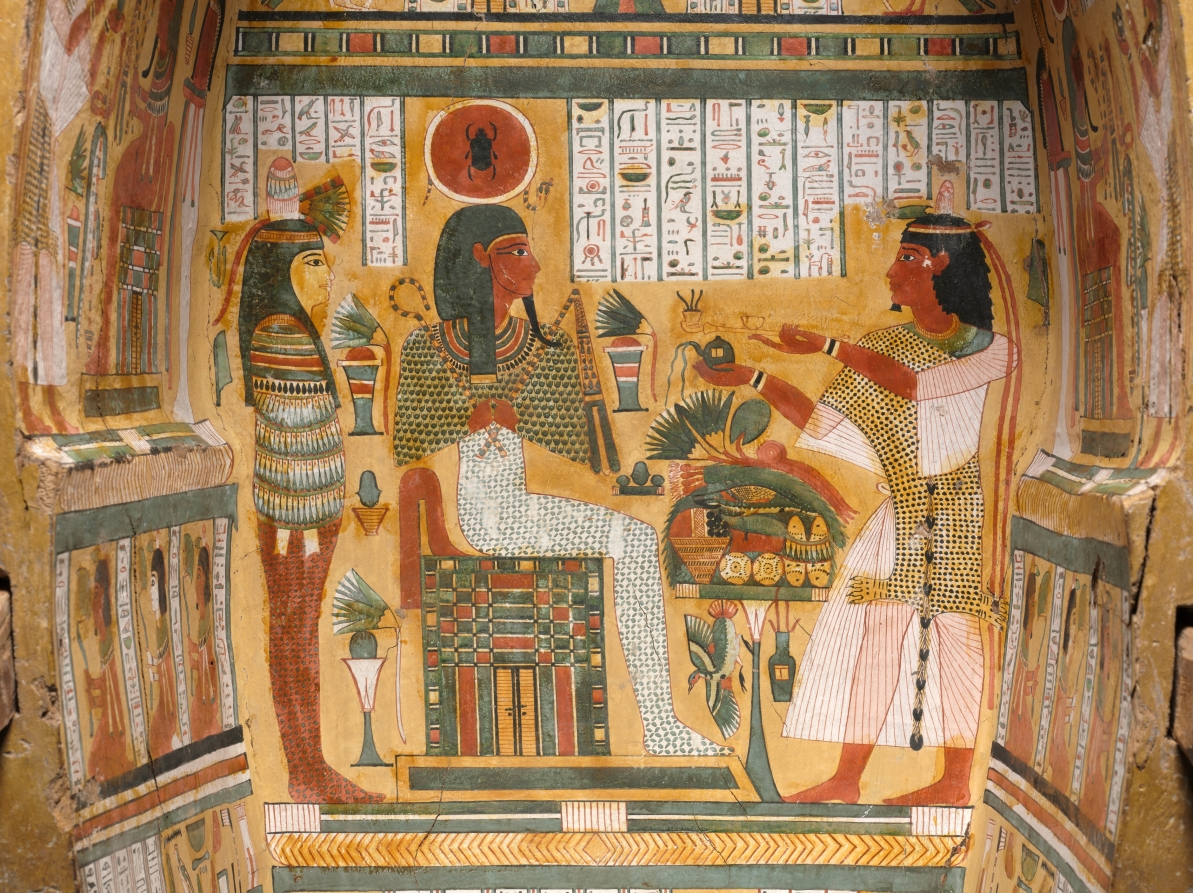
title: Coffin of Nesykhonsu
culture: Egypt, Thebes, Third Intermediate (1069–715 BCE), Dynasties 21–22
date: c. 976–889 BCE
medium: gessoed and painted sycamore fig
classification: Funerary Equipment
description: Egyptian coffins told stories and illustrated spells to help the deceased transition safely to the afterlife. Inside Nesykhonsu's coffin there are two jackals, one facing right and the other left, near the top. Here, the jackal represents the powerful deity Anubis, the god of the afterlife and embalming.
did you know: Two of Nesykhonsu's titles, "Lady of the House" and "Singer of the Choir of Mut the Great," are written on the outside of the coffin.